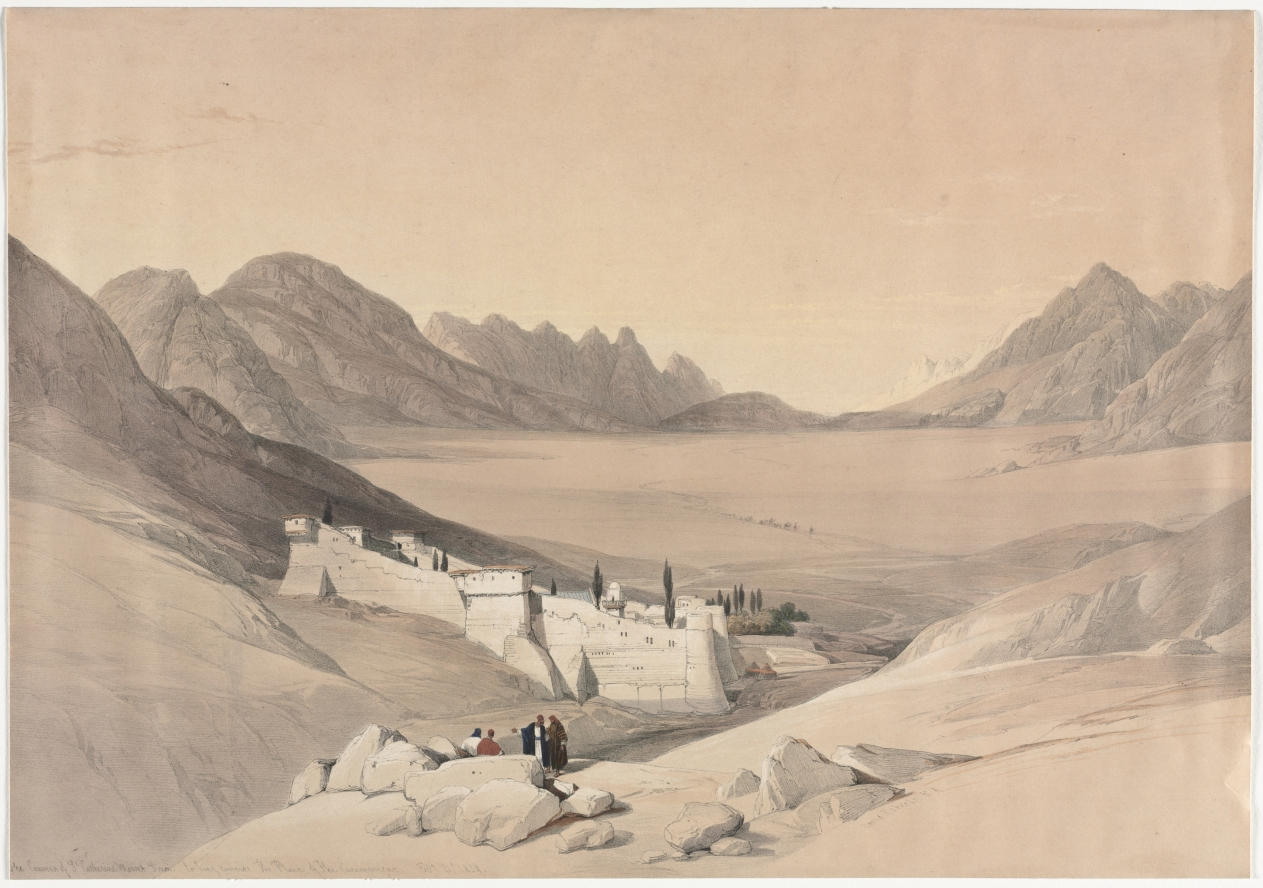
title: The Convent of St. Catherine, Mount Sinai, Looking towards the Plain of the Encampment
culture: England, 19th century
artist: David Roberts (Scottish, 1796–1864)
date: 1839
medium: color lithograph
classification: Print